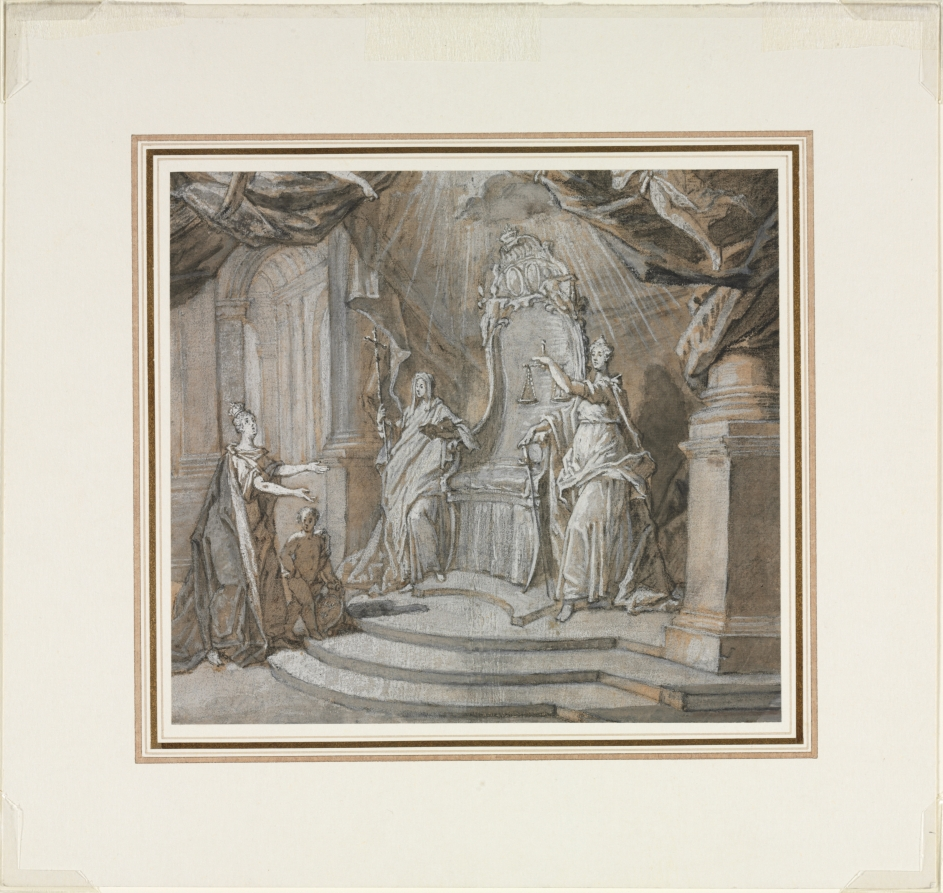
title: Madame de Maintenon Returning to the Catholic Church [1]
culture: France, 18th century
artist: Charles Dominique Joseph Eisen (French, 1720–1778)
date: 1700s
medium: black chalk and brown wash, heightened extensively with white (gouache) with graphite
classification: Drawing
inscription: Faint signature on smaller drawing, upper center within a cartouche: Eisen; on verso of each mount, inscribed in pencil: Charles D.J. Disen 1720-1778/Mme de Maintenon being received back into Catholic Church/Ex collection Marquis de Lagoy (1764-1819) Aix-en-Provence